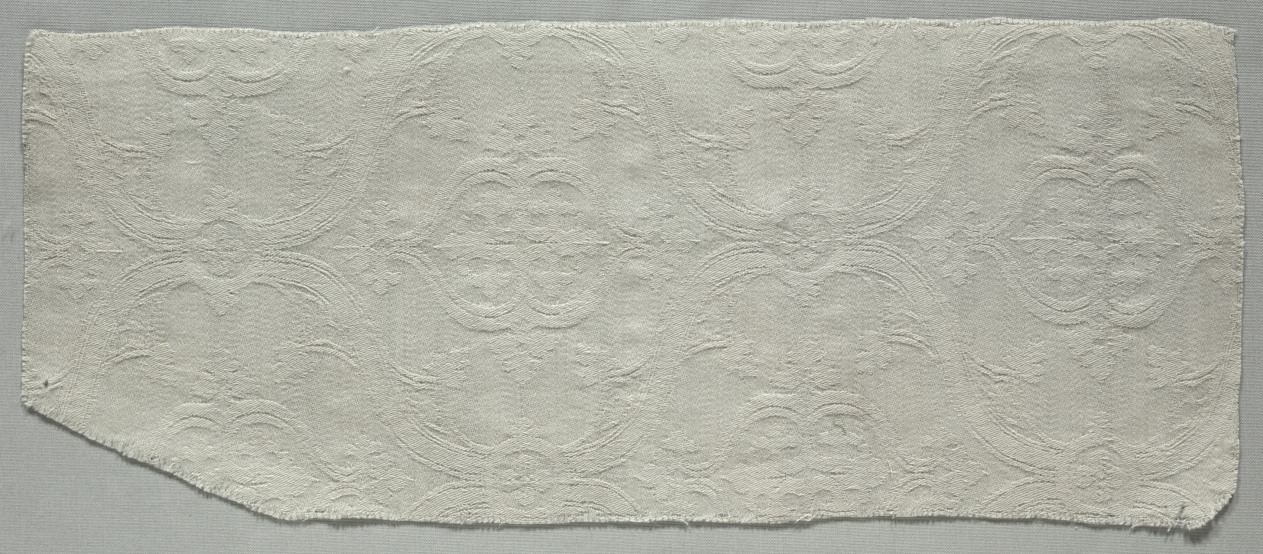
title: Textile Fragment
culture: Italy, 19th century (copy of late 15th - 16th-century style)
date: 1800s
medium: damask; wool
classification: Textile